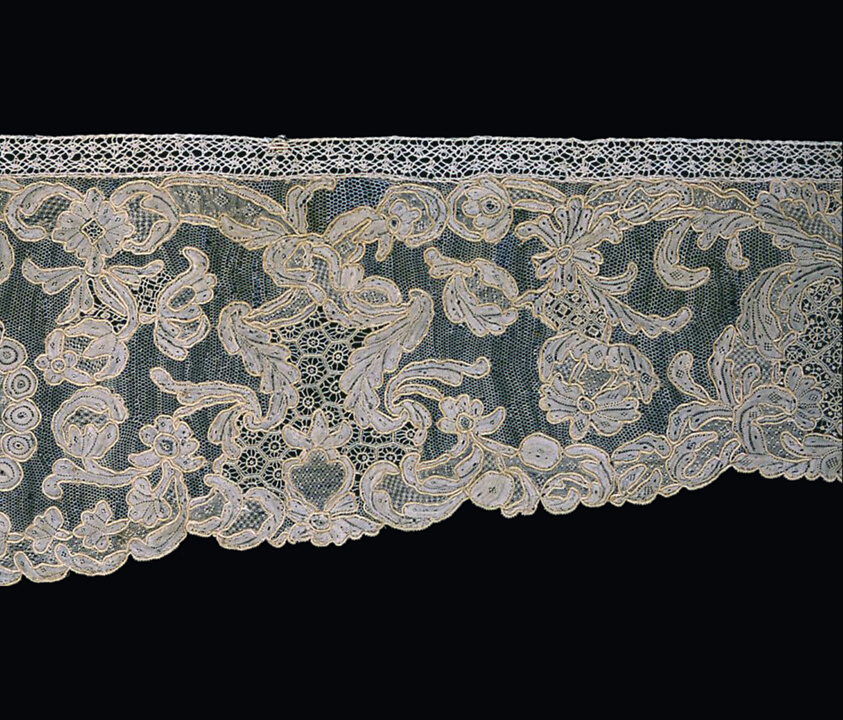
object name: Textile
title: Border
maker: France, Valenciennes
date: 1750s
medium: Linen, bobbin straight lace of a type known as "Valenciennes" with a five hole mesh ground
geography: Valenciennes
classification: textile; lace - bobbin